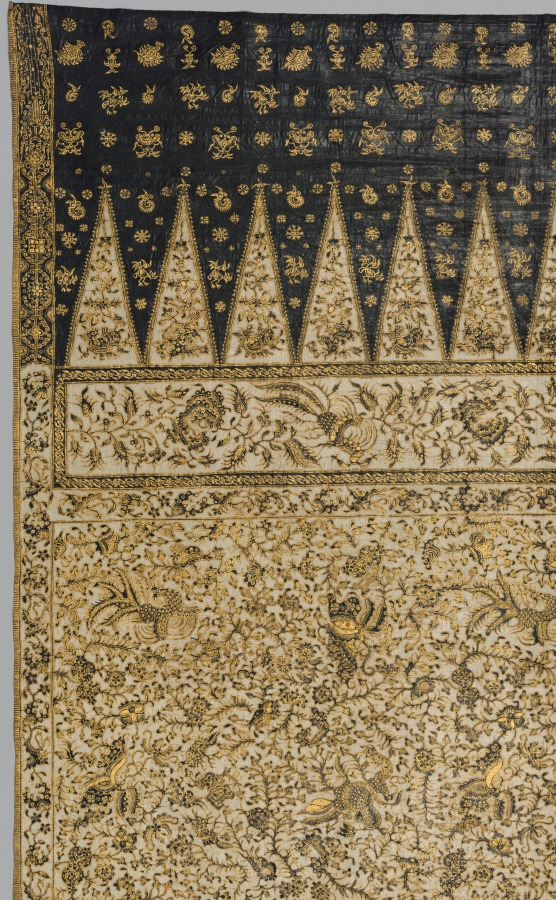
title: Sarong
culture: Indonesia, Java, North Coast, 19th century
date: 1800s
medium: batik and applied gold, cotton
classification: Textile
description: This sarong, overlaid with gold leaf (or gold dust), would have been worn for high ceremonial occasions and festivals. The gold has been applied only to the parts of the sarong that would show when draped, and on one side only. The delicate, linear design with Chinese phoenixes, butterflies, and leafy tendrils is one of the characteristic styles of batiks made in cities along the north coast of Java. The "tumpal" (triangle) design of the wide end border (a pan-Southeast Asian motif that commonly occurs on northern Javanese batiks) seems to have symbolized growth and fertility as well as the sacred mountain, Meru.